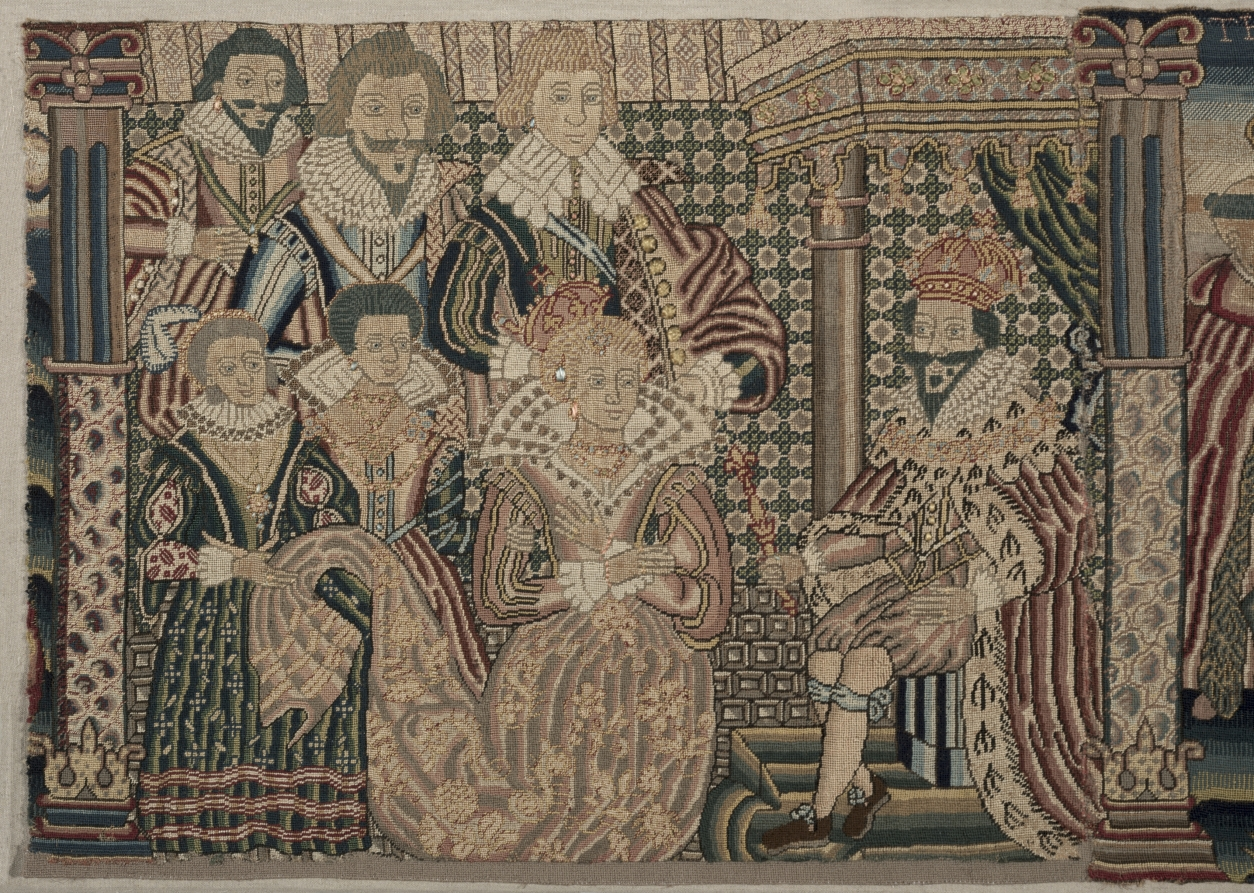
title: Section of an Embroidered Frieze: Ahasuerus and Esther, The Pope Chiding the Emperor, Henry VIII treading on the Pope's Neck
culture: England, Period of Charles I (1625-1649), 17th century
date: 1625–1649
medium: petit-point embroidery; wool and silk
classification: Embroidery